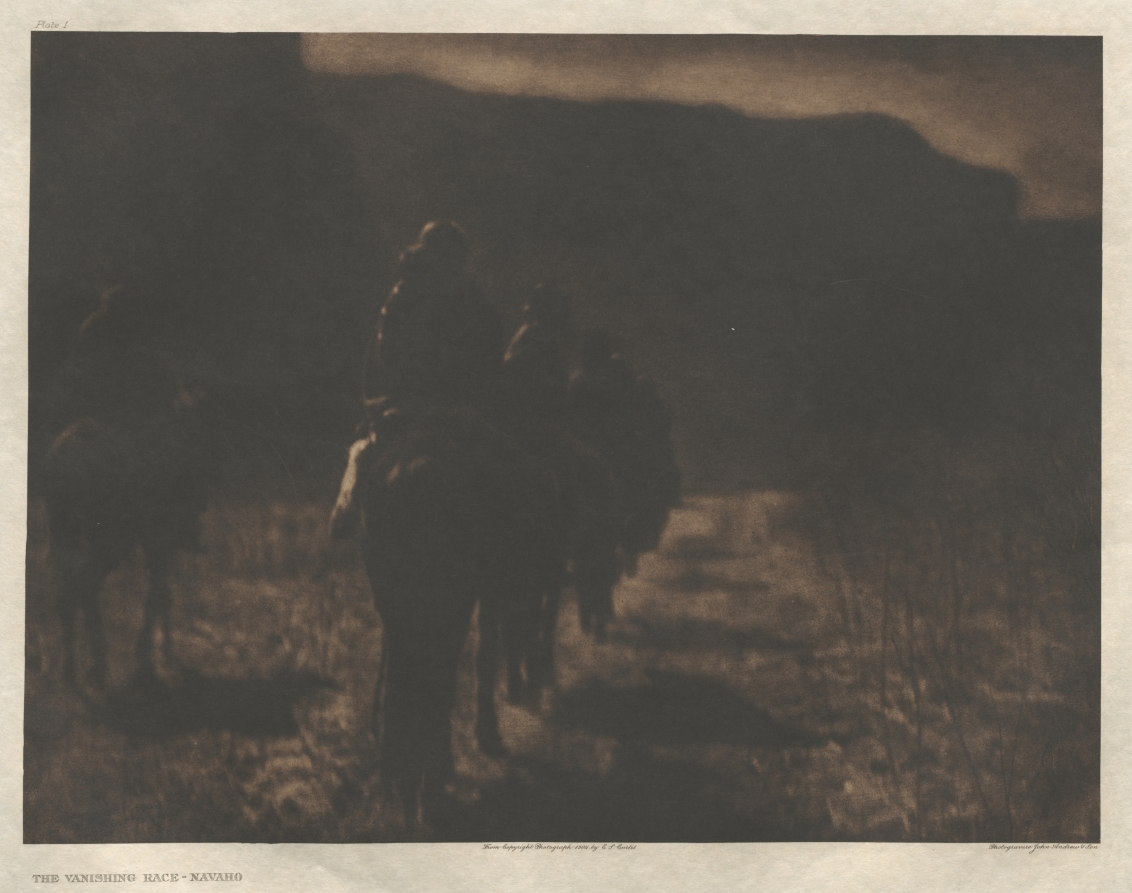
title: Portfolio I, Plate 1: The Vanishing Race-Navajo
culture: America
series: The North American Indian: being a series of Portfolios picturing and describing the Indians of the United States, the Dominion of Canada, and Alaska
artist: Edward S. Curtis (American, 1868–1952)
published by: The University Press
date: 1904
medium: photogravure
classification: Portfolio